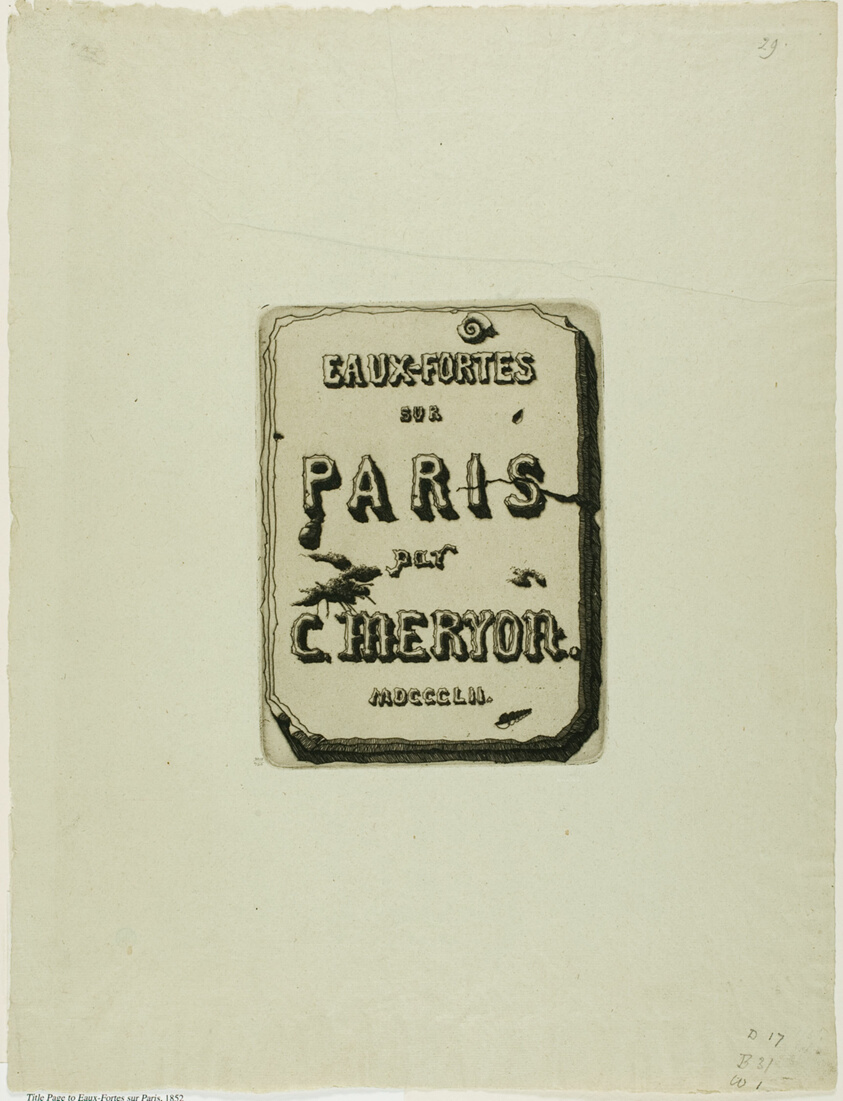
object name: Print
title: Title Page to Eaux-Fortes sur Paris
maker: Charles Meryon (French, 1821-1868)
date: 1852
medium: Etching in warm black on verdâtre (greenish-ivory) laid paper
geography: France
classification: etching; print; prints and drawing